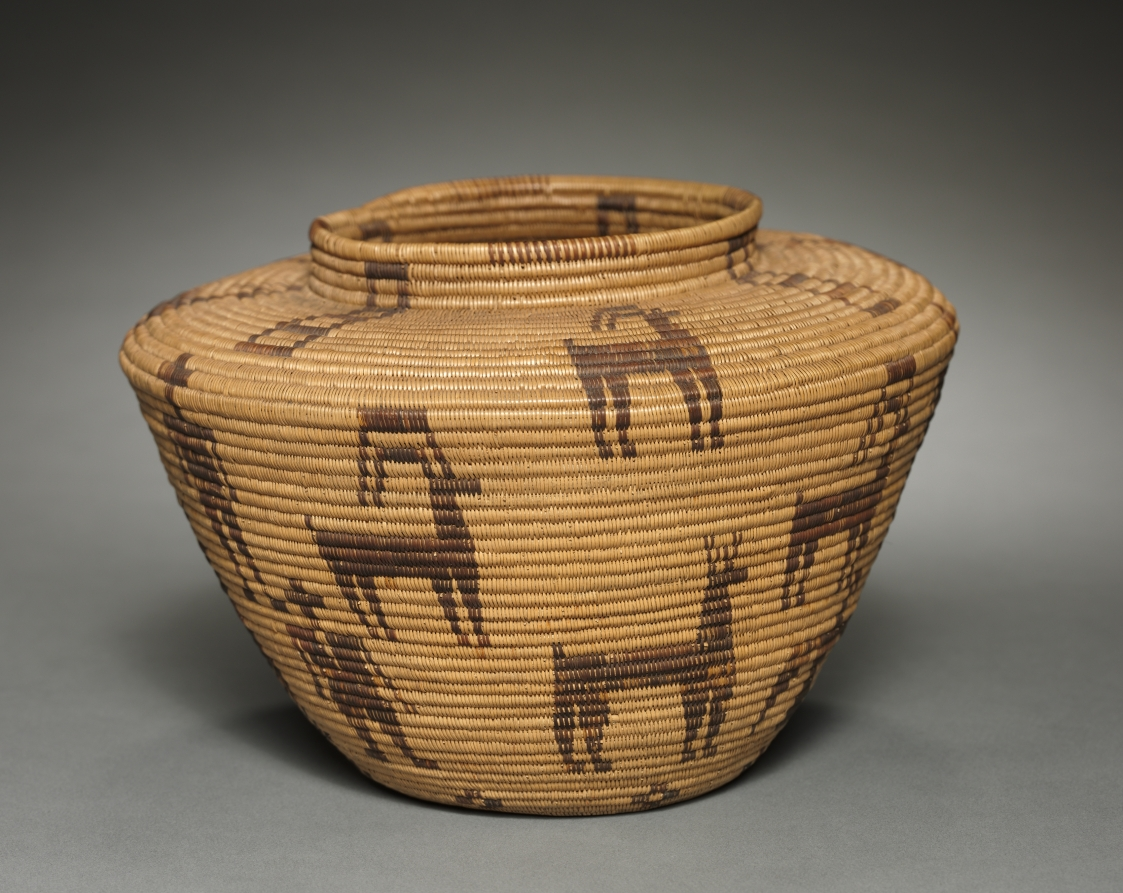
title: Jar-shaped Basket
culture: Native North America, Great Basin, California, Death Valley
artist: Sarah Hunter (Timbisha Shoshone (Panamint), 1883–1967)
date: 1910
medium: Willow, bulrush; coiled (3 rods)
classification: Basketry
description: Sarah Hunter’s basketry is noted for geometricized motifs reminiscent of the animals depicted in petroglyphs on canyon walls in the Death Valley region. Here they include pronghorn mountain sheep, deer, and birds, along with humans, all created in light-brown bulrush against a honey-colored willow ground. Traditional Indigenous basket weavers, who have exhaustive knowledge of the plant world, tend, harvest, and prepare their own materials. If stages of the process are not done properly and at the right time, color will be uneven and stitches will twist and split.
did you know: Some Timbisha Shoshone women continue traditions of basket weaving to the present day.